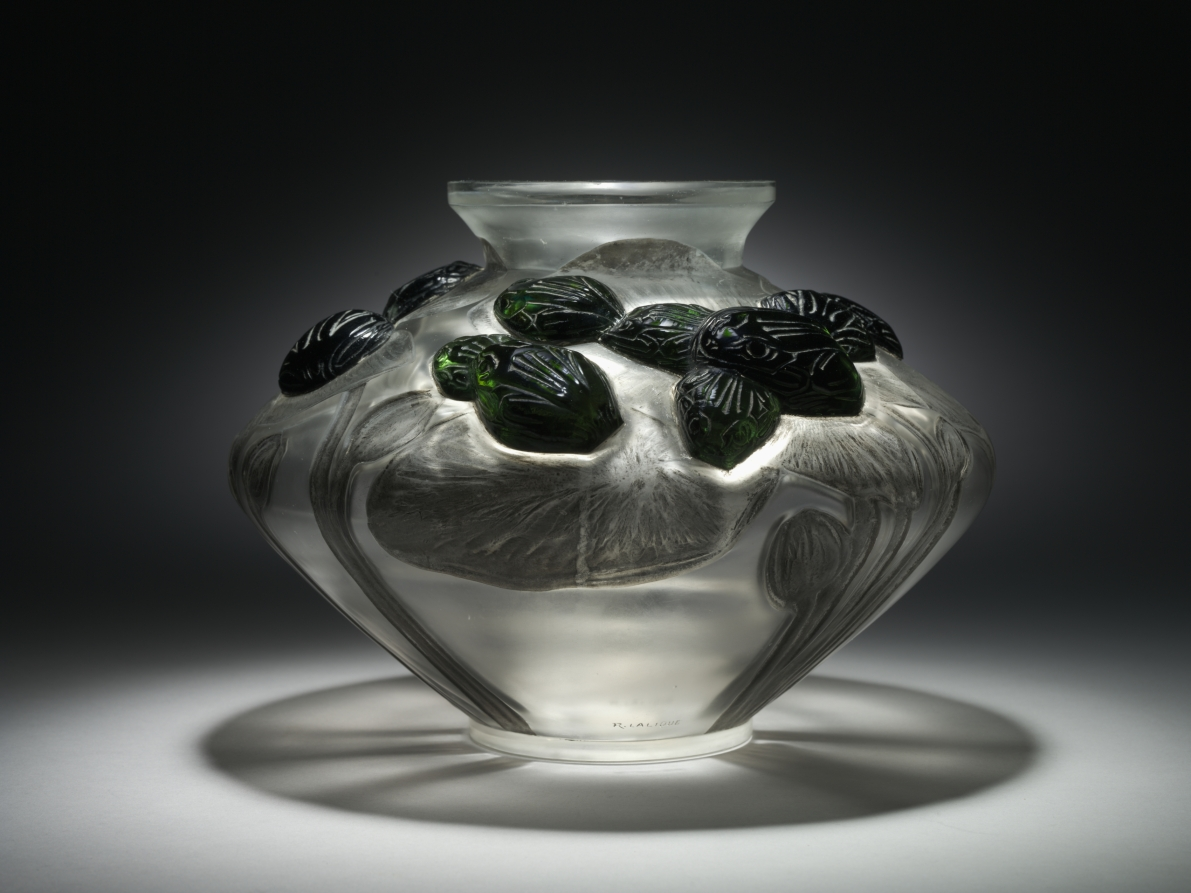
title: Frogs and Lily Pads (Grenouilles et Nénuphars) Vase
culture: France, 20th century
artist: René Lalique (French, 1860–1945)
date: 1909–12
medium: glass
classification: Glass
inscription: "R. Lalique"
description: This vase is an early example of French designer René Lalique's experimentation with producing artistic glass. Lalique combines applied, cast, and molded glass techniques to achieve an ethereal effect of a murky swamp, a typical Art Nouveau motif. Lily pads adorn the surface with green frogs perched on top.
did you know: René Lalique placed little sheets of metal foil behind the applied green frogs to reflect a dark green tint back to the viewer.